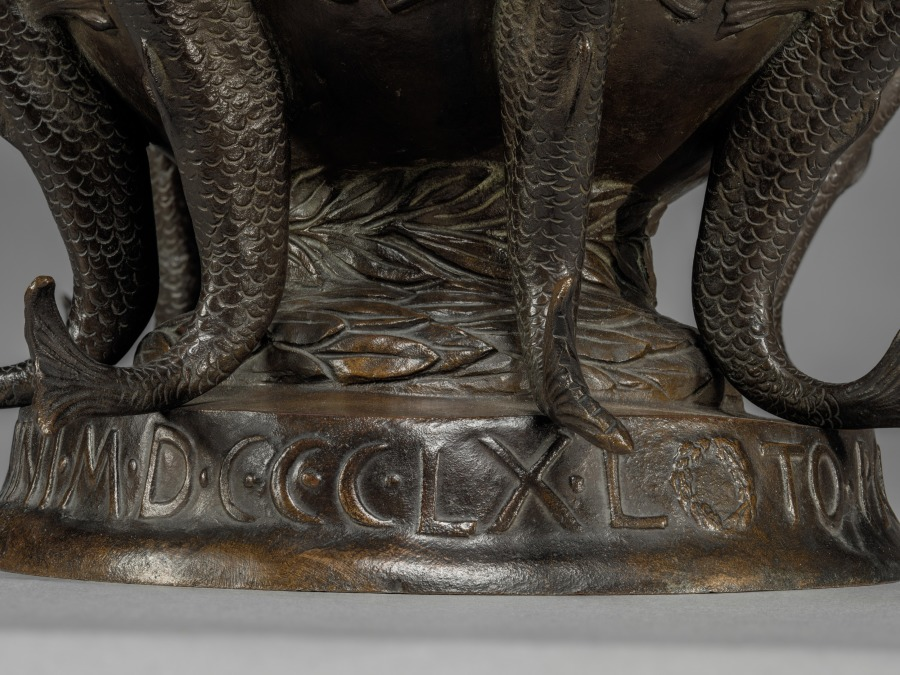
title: Pan of Rohallion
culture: America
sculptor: Frederick William MacMonnies (American, 1863–1937)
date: 1890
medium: bronze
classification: Sculpture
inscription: Signed on globe: Frederick MacMonnies, Paris 1890. © 1894. Inscribed around base: TO PAN OF ROHALLION ANNO DOMINI MDCCCLXL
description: Rohallion in the title refers to the name of an estate in New Jersey, whose owner commissioned MacMonnies to create a large fountain of this design for a garden pool. Later, the artist made several smaller versions, such as this example. Here, the ancient Greek god Pan plays his musical pipes while standing on an orb supported by fish.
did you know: The character of Peter Pan, including his flute playing, references the Greek god Pan.